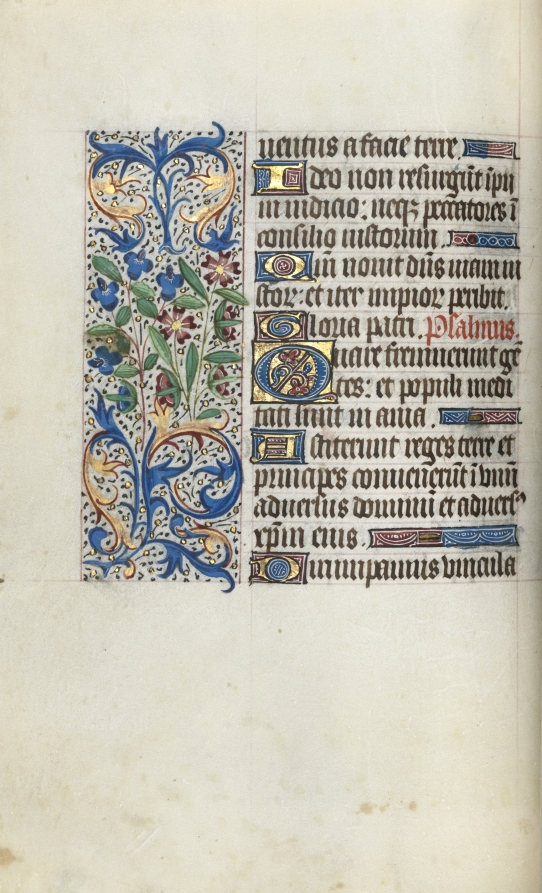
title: Book of Hours (Use of Rouen): fol. 57v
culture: France, Rouen, 15th century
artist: Master of the Geneva Latini (French, active Rouen, 1460–80)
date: c. 1470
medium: ink, tempera, and gold on vellum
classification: Bound Volume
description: In the late 1400s and early 1500s Rouen was an established and important center of book production. The city’s cathedral had a wealthy chapter that spent large sums of money to commission books and to maintain its extensive library. The stationers and booksellers would have likely been concentrated in or near the cathedral precinct. This artist, named after a manuscript now in Geneva, was Rouen’s principal illuminator during the second half of the 1400s.